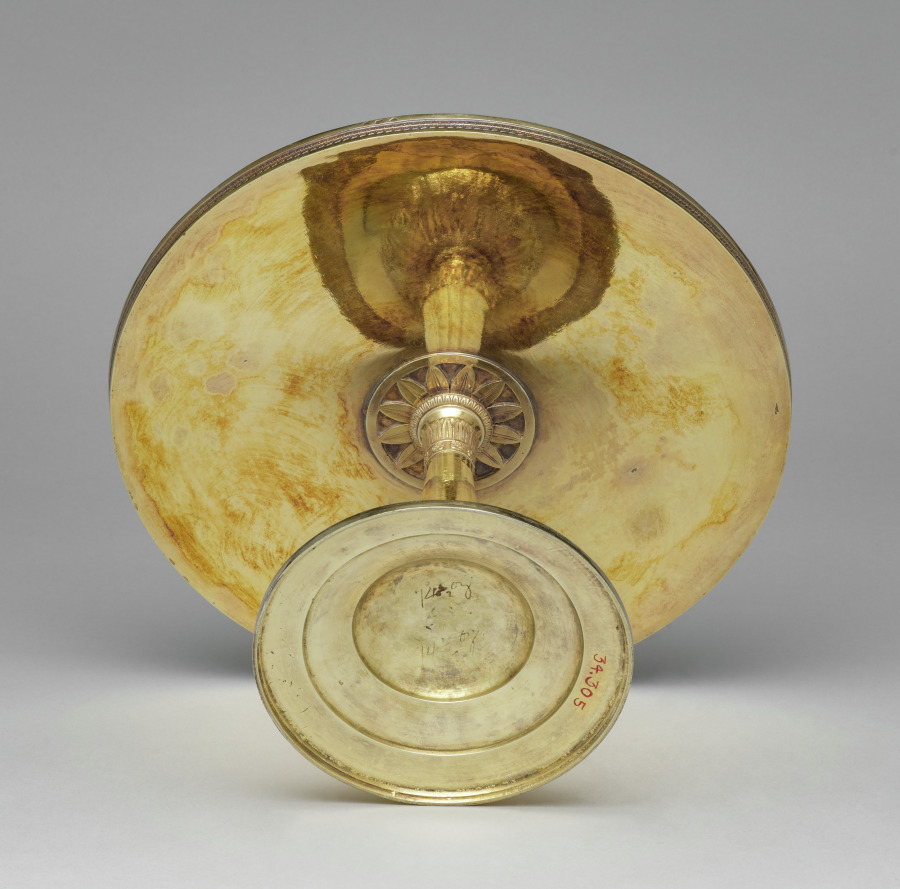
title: Tazza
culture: Italy, Rome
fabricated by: Pietro Paolo Spagna (Italian, 1793–1861)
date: c. 1815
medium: silver gilt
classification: Silver